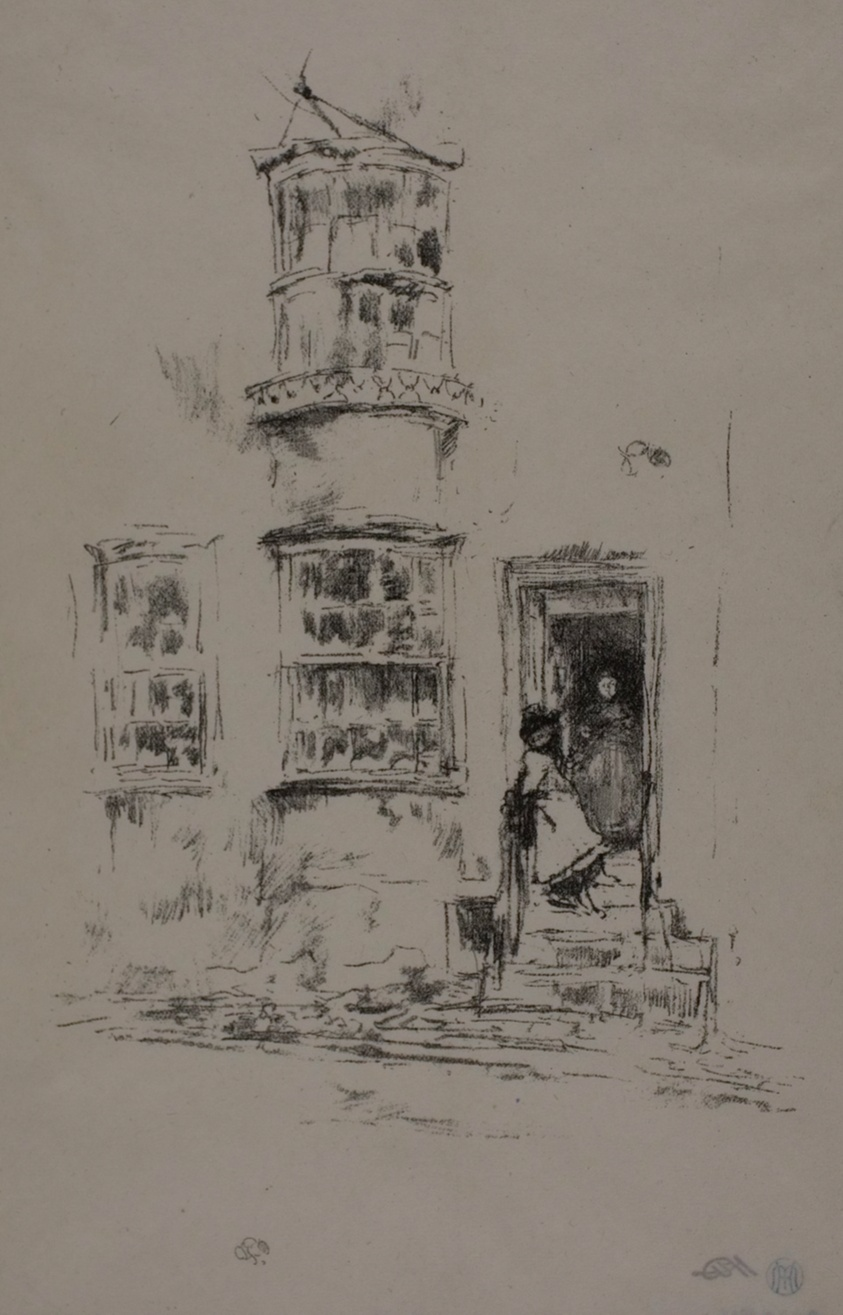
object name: Print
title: The Little Steps, Lyme Regis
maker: James McNeill Whistler (American, 1834-1903)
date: 1895/96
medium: Transfer lithograph in black on ivory wove paper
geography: United States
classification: transfer lithograph; lithograph; print; prints and drawing; paper